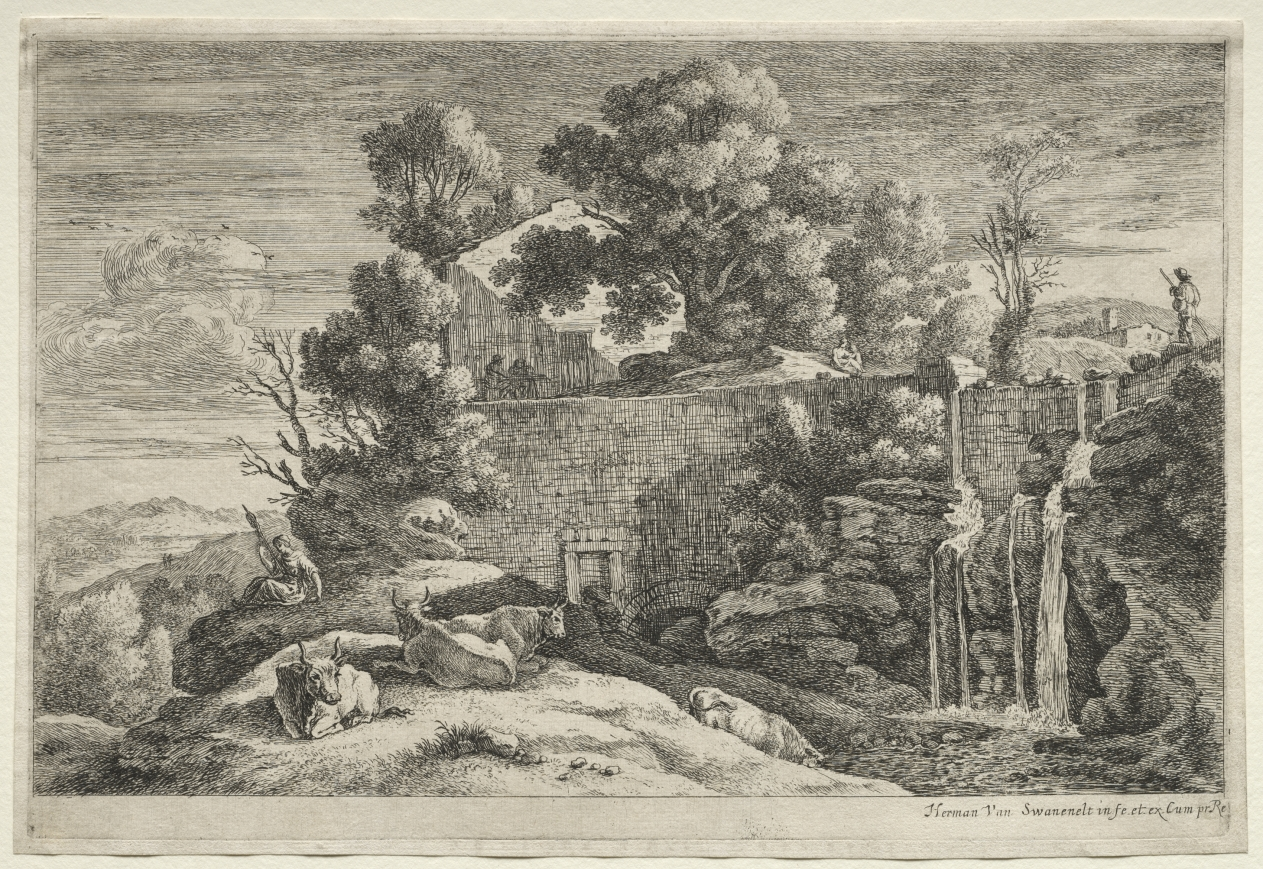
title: Landscape with a Woman Spinning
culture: Netherlands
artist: Herman van Swanevelt (Dutch, c. 1600–1655)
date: 1643–55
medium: etching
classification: Print